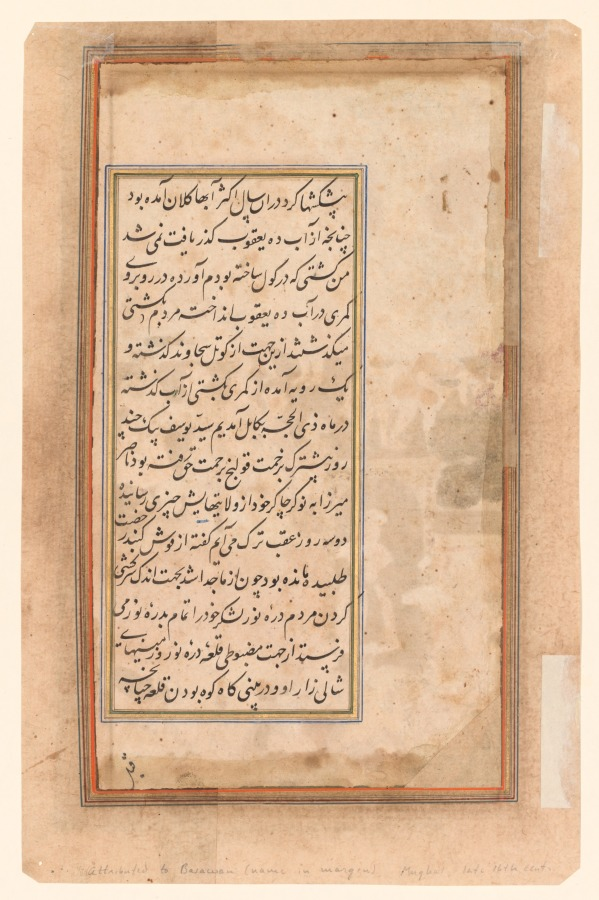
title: A feast for Babur hosted by his half-brother Jahangir Mirza in Ghazni in May 1505, from a Babur-nama (Memoirs of Babur)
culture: India, Mughal, 16th century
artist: Basavana (Indian, active c. 1560–1600)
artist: and Madhav Khurd (Indian, active late 1500s)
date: c. 1589; outer margins added c. mid-1900s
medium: Gum tempera and gold on paper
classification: Painting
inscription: verso: Persian text, in nasta‘liq script: . . . presented many gifts. In that year most of the rivers had become very swollen, to the extent that the Dih-i Ya‘qub River could not be forded. I brought the boat I had made at the lake and floated it in the waters of Dih-i Ya‘qub opposite Kamri and all the people crossed by boat. For this reason we went through the Sajavand pass and straight through crossing the river at Kamri by boat. We arrived at Kabul in the month of Dh’ul-Hijja [May 1505]. A few days earlier, Sayyid Yusuf Beyg had died of colic. At Kush Gunbad, Nasir Mirza had requested leave and remained behind to get provisions for his retinue from his own domain, saying he would follow in two or three days. Once he had left us he sent his entire army to the Nur valley on account of a minor act of disobedience by the people of the Nur valley. [Given] its rice fields and the location of its citadel on the peak of the mountain as . . .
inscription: recto: Persian inscription in bottom margin, in nasta‘liq script: the work of Basavana / [ . . . ] / Madhav Khurd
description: Twenty-one years before his conquest of Delhi, Babur took control of territories in Afghanistan, including the cities of Kabul and Ghazni. His half-brother, who controlled the region around Ghazni, ordered that a party be thrown in honor of Babur’s arrival from the north. Drinking parties and feasts in lavish movable tent settings, where gifts were exchanged, alliances forged, and relationships cemented, were as important to the building of the empire as the battles.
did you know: A manager directs servers to bring spoons and lay out the buffet table.